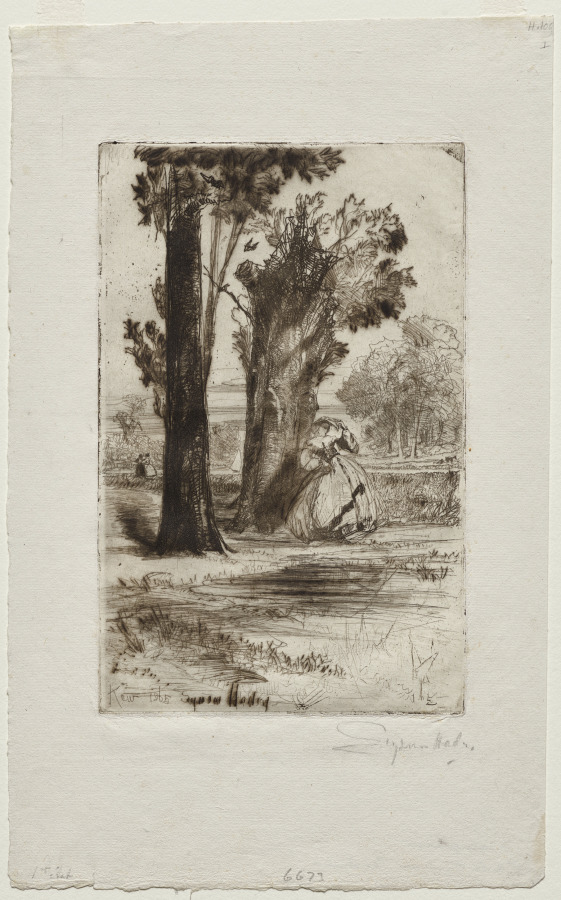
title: The Assignation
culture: England, 19th century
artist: Francis Seymour Haden (British, 1818–1910)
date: 1865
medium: etching and drypoint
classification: Print